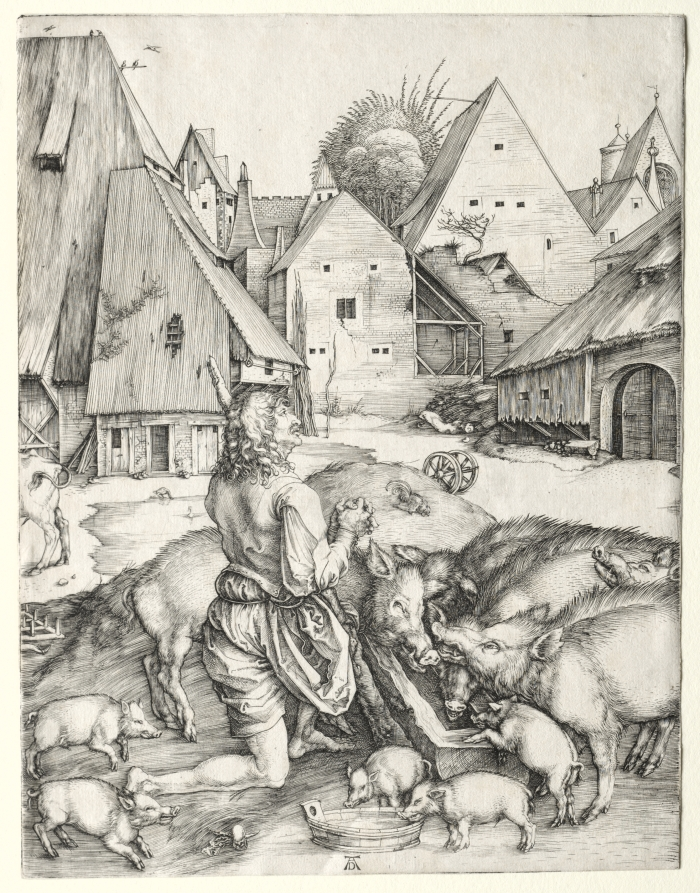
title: The Prodigal Son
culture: Germany, late 15th-early 16th Century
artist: Albrecht Dürer (German, 1471–1528)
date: c. 1496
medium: engraving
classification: Print